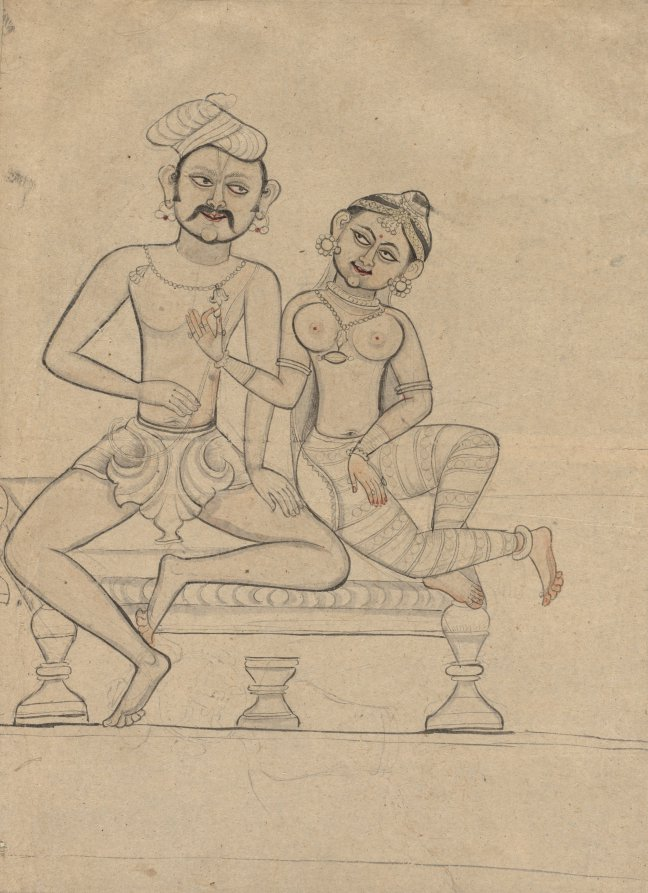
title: Seated Couple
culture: India, Mysore, early 19th Century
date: c. 1800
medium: ink and color on paper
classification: Drawing